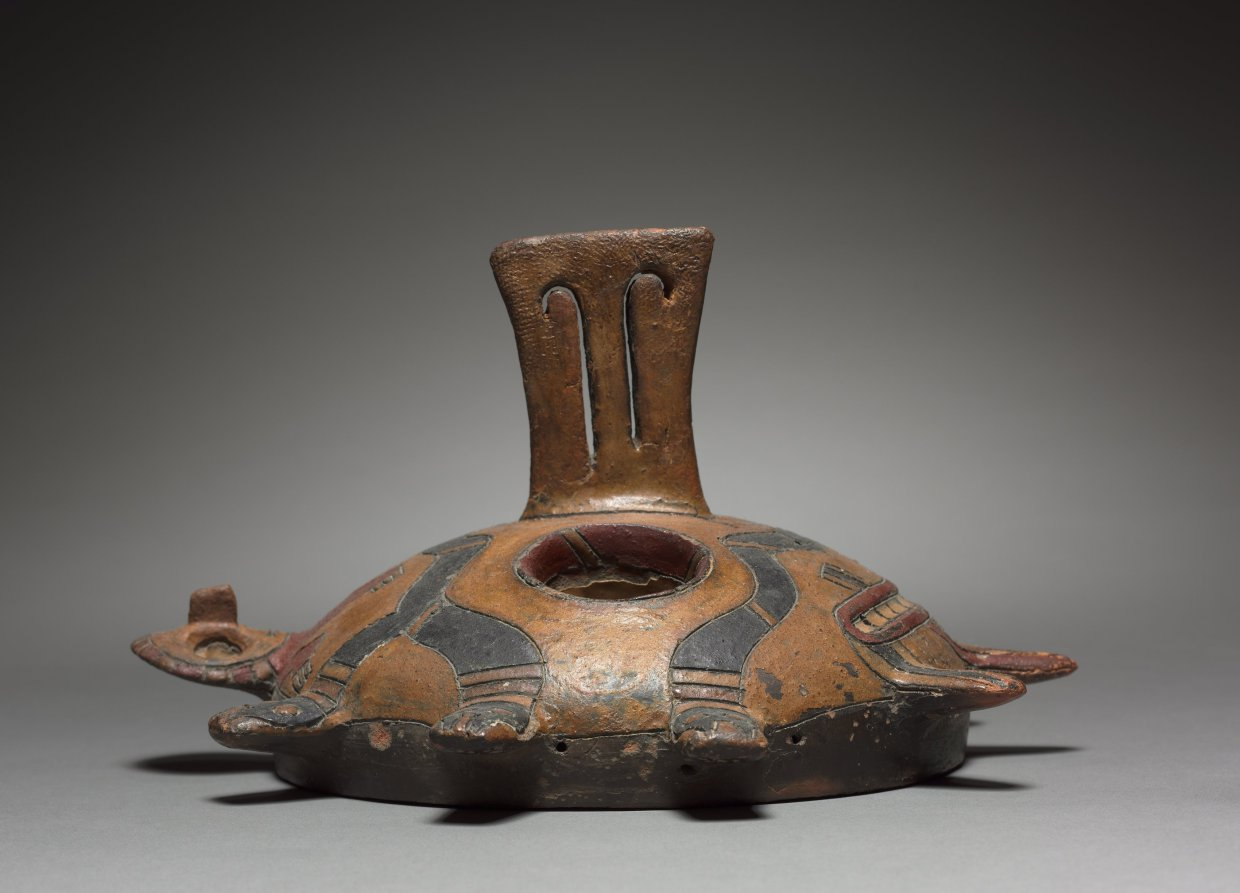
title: Oculate Being Mask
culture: Peru, South Coast, Paracas (Cavernas) style (700 BCE–1 CE)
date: 300 BCE–1 CE (thermoluminescence date, 835 BC–185 CE)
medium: ceramic, resin-based paint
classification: Ceramic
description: This rare mask incarnates a supernatural being who may have been the patron of an early fertility cult on Peru’s south coast. Its traits insinuate power, especially the stuck-out tongue and the serpents that slither over the face to form a halo-like corona. Unexplained are the shape of the nose and the small figure wearing a similar mask. The mask could have served as the face of a mummy bundle or an object; the projecting eyes might rule out use by a living performer.